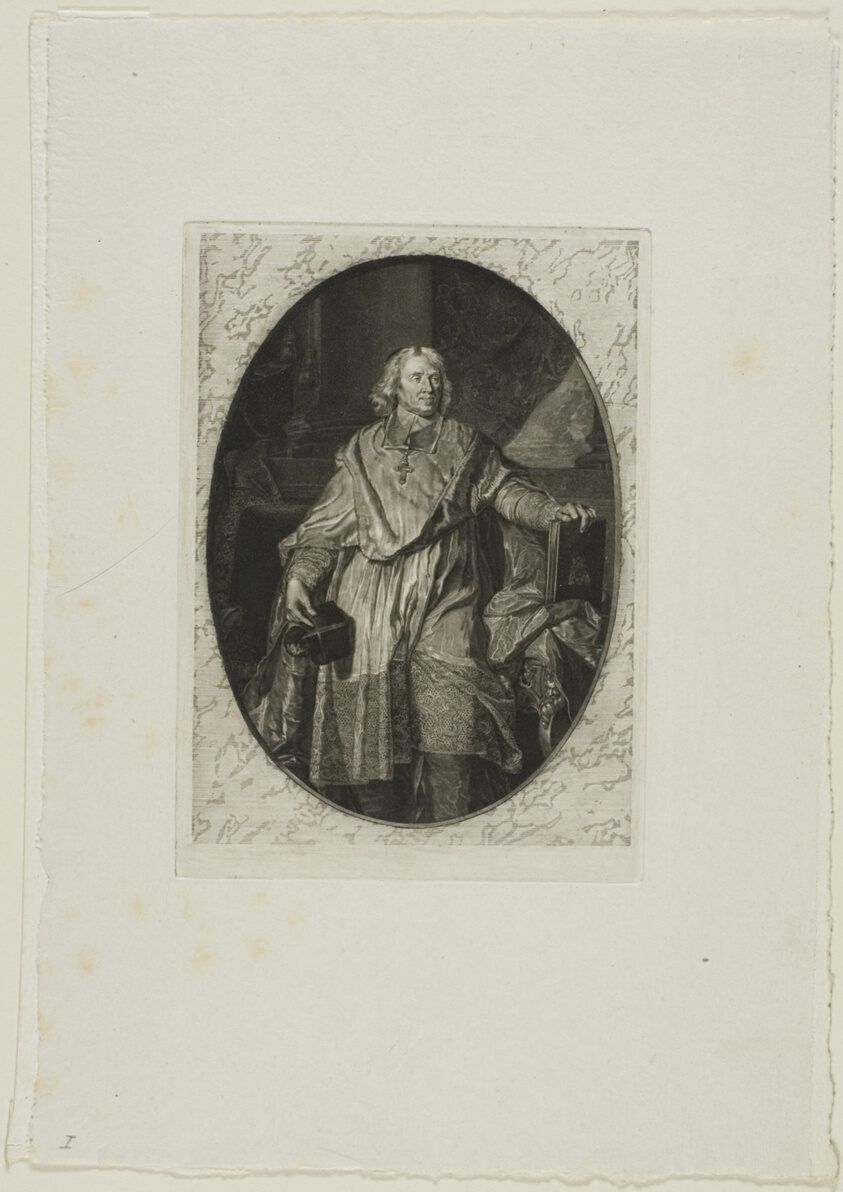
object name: Print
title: J-B. Bossuet: Standing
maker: Jean-Baptiste de Grateloup (French, 1735-1817)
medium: Engraving on paper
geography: France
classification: engraving; print; prints and drawing